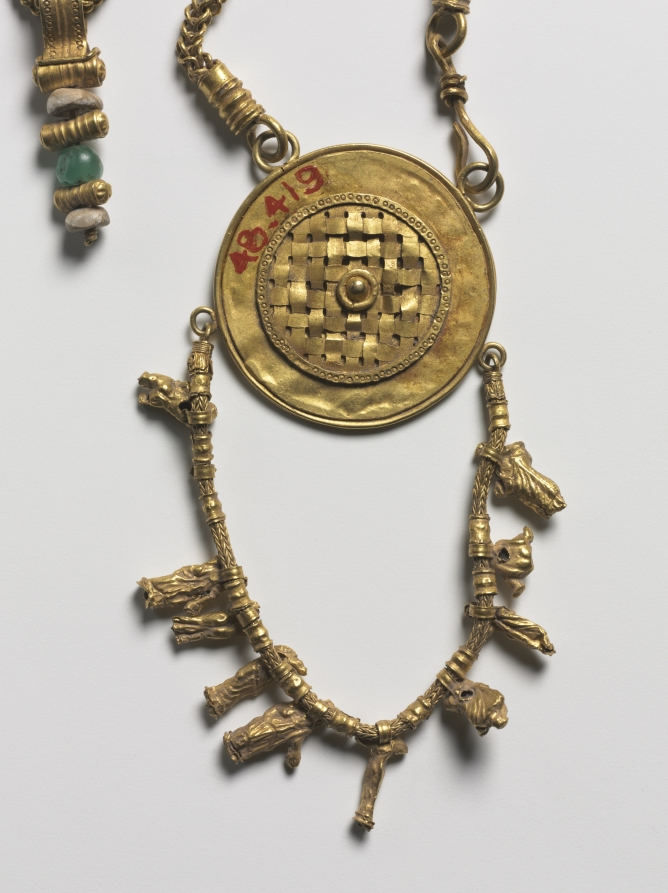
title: Collar with Medallion and Pendant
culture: Egypt, Alexandria, Roman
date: Collar: c. 200–300 CE, Coin: c. 177 CE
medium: gold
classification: Jewelry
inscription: "L. AUREL. COM.MODUS AVG."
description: This necklace is an amalgamation of several different pieces. A thick gold chain is attached to a central medallion, which holds a coin of the Roman emperor Commodus in its center, possibly an ancient replica. A second pendant chain is attached to the bottom of the medallion, strung with ten tiny amulets representing figures of gods, goddesses, and theatrical actors.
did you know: The undamaged pendant figures include, among others, Baubo, Serapis, Isis-Demeter, and a dwarf (perhaps a comic actor).